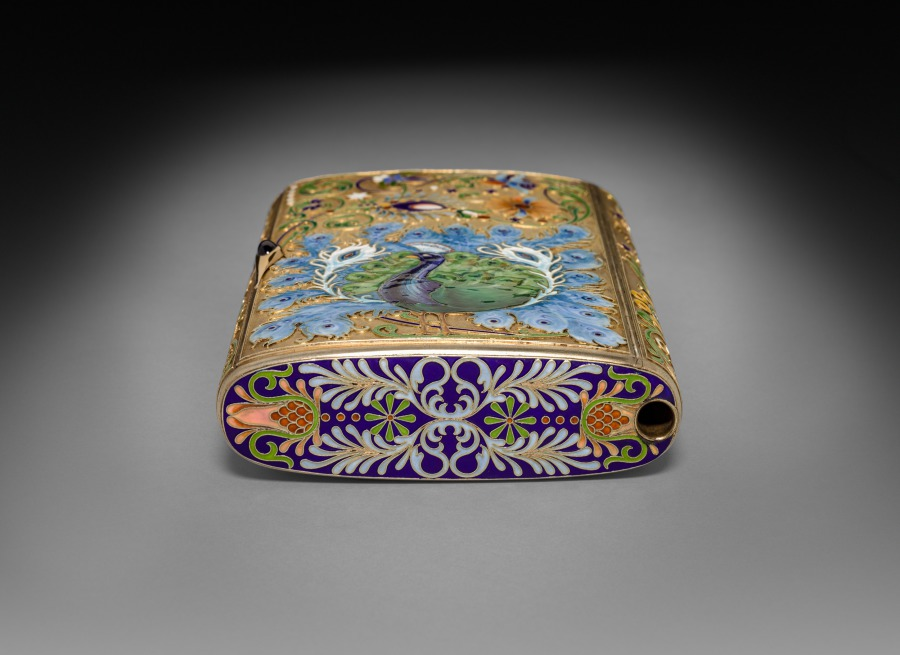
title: Cigar Box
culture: Russia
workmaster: attributed to Feodor Ivanovich Rückert (Russian, 1840–1917)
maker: House of Fabergé (Russian, 1842–1918)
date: c. 1896–1908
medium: Silver gilt, enamel, sapphire set in gold; [reproduction silk tinder cord, gold and moonstone catch]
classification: Silver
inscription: C. Fabergé (in Cyrillic); double-headed eagle [imperial warrant]; 84, Kokoshnik, tester's initials [assay mark for Moscow, 1896-1908]; scratched 16358.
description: Fabergé’s craftsmen in Moscow became known for their work in the pan-Slavic or neo-Russian taste, hearkening back to 17th-century styles of Russian folk decoration. In this whimsically oversized box for cigars or loose tobacco, Fabergé used the technique to highlight a symbol of imperial royalty, the preening peacock, here rendered in brilliant hues of blue and green enamels.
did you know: Peacocks were considered a symbol of imperial royalty in Russia.